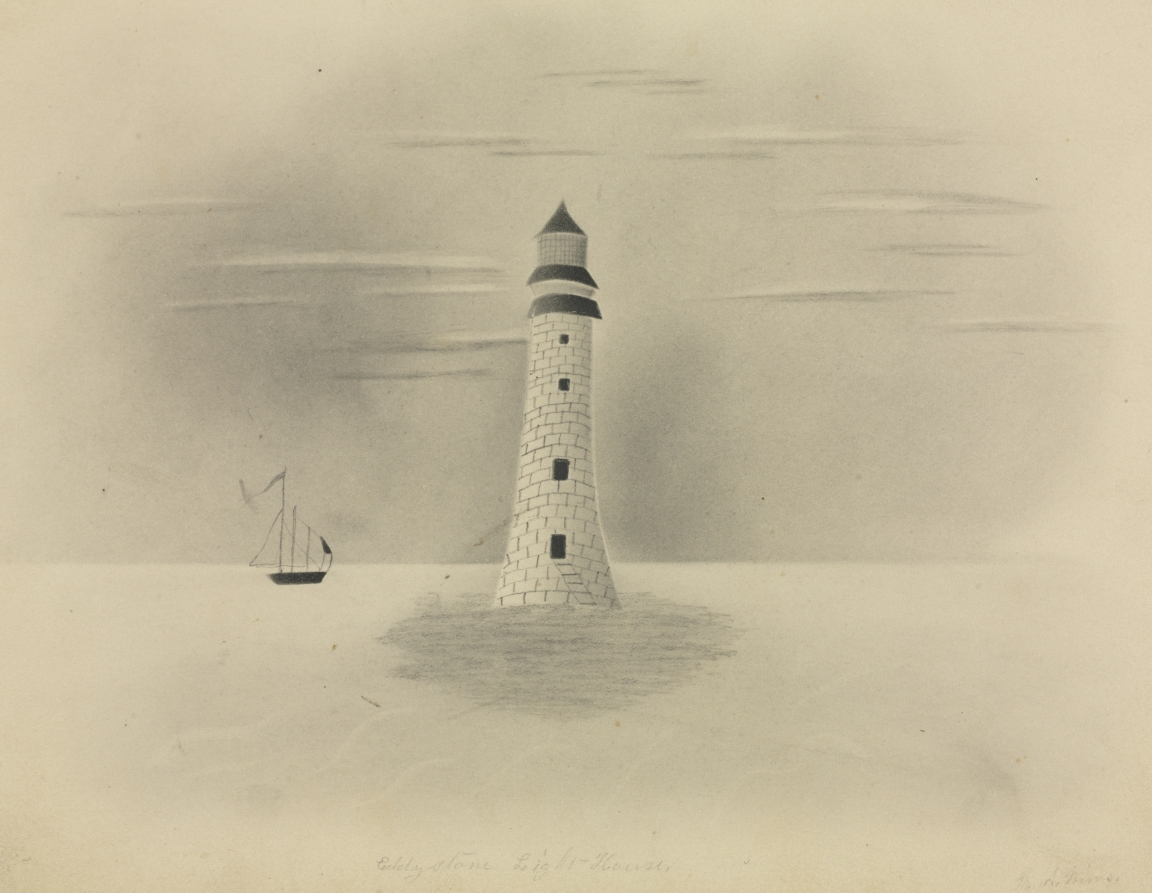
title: Eddystone Lighthouse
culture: America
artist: Mary Altha Nims (American, 1817–1907)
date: 1840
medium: pencil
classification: Drawing